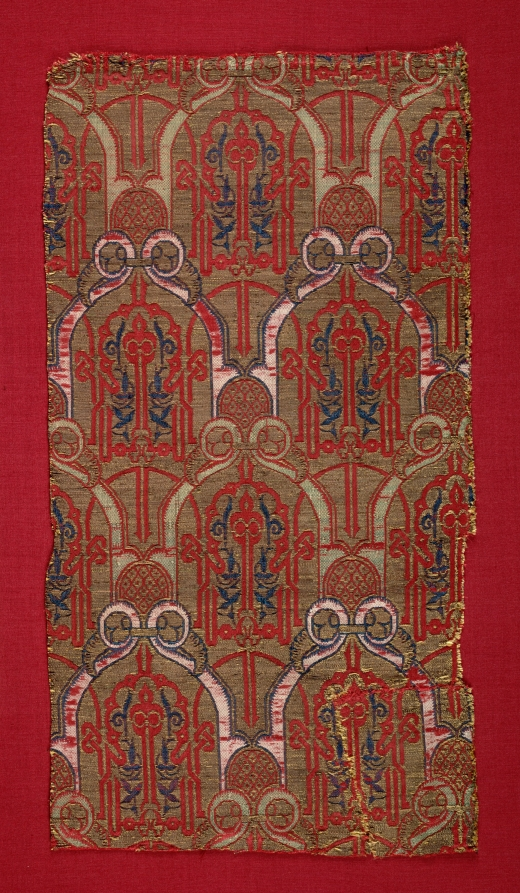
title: Fragment with palmette arches with Alhambra wall pattern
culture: Spain, Granada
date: 1300s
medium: Silk and gilt-metal thread: lampas weave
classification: Textile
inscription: horizontal rows of staggered arch-like forms enclose knotted and interlaced Kufic inscriptions: "Success."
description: This rare, gold-thread silk displays a sophisticated pattern that also decorates the stucco walls of the Alhambra, the imperial palace in Granada. Three superimposed designs form the harmonious pattern on the golden ground. Split-palmette leaves in ivory or green silk form staggered arches displaying a crimson text, Good fortune, written in angular Arabic script with extended strokes that create secondary symmetrical arches. Deep blue palmette leaves create the third level of decoration. The interior walls of the Alhambra would have shimmered with these warm, patterned textiles.